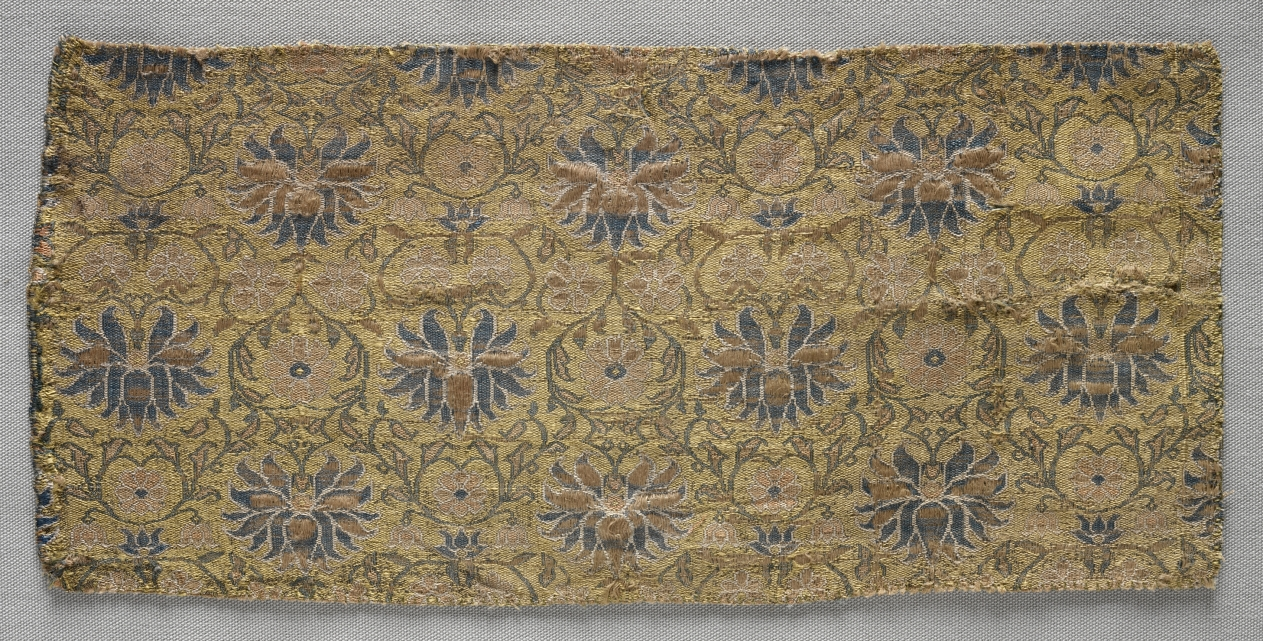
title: Fragment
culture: Iran, late 17th century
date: late 1600s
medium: brocade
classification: Textile